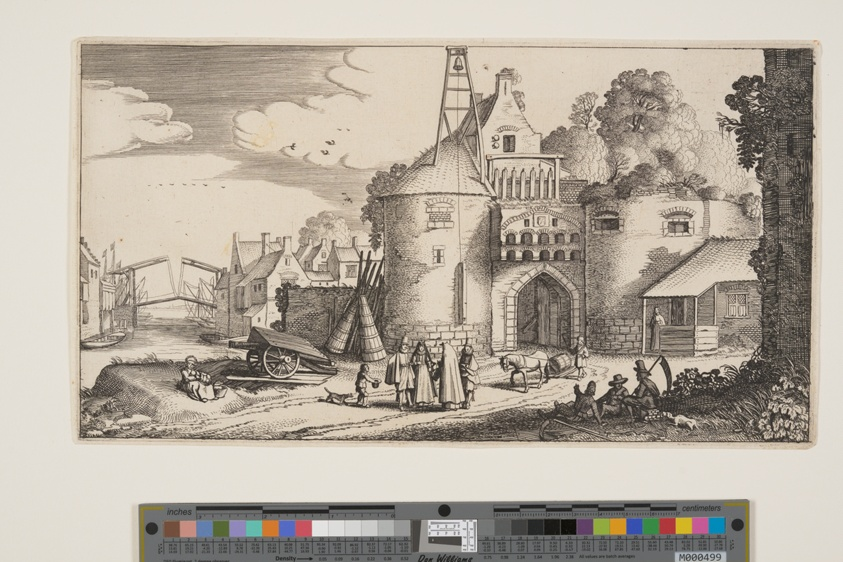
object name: Print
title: Town Gate, from Landscapes (Playsante Lantschappen)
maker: Attributed to Claes Jansz. Visscher II (Dutch, 1586-1652); after Jan van de Velde II (Dutch, c. 1593-1641)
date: c. 1641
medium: Etching, with engraving, on ivory laid paper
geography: Netherlands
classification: etching; paper; print; prints and drawing